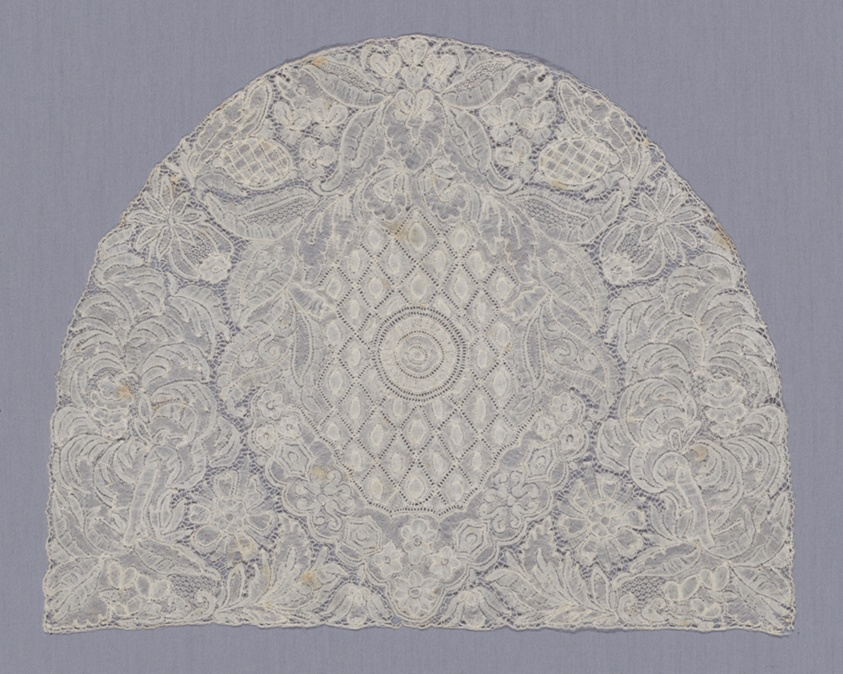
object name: Costume and Accessories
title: Cap Crown and a Pair of Lappets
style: 18th Century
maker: Flanders, Brussels (modern day Belgium)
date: 1720s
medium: Linen, bobbin part lace of a type known as "Brussels"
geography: Flanders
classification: costume accessory; lace - bobbin; lace; textile; costume - lace; costume accessory - headdress; costume accessory worn above the waist; headdress; costume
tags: floral motifs, diamond shapes, flowers, foliage